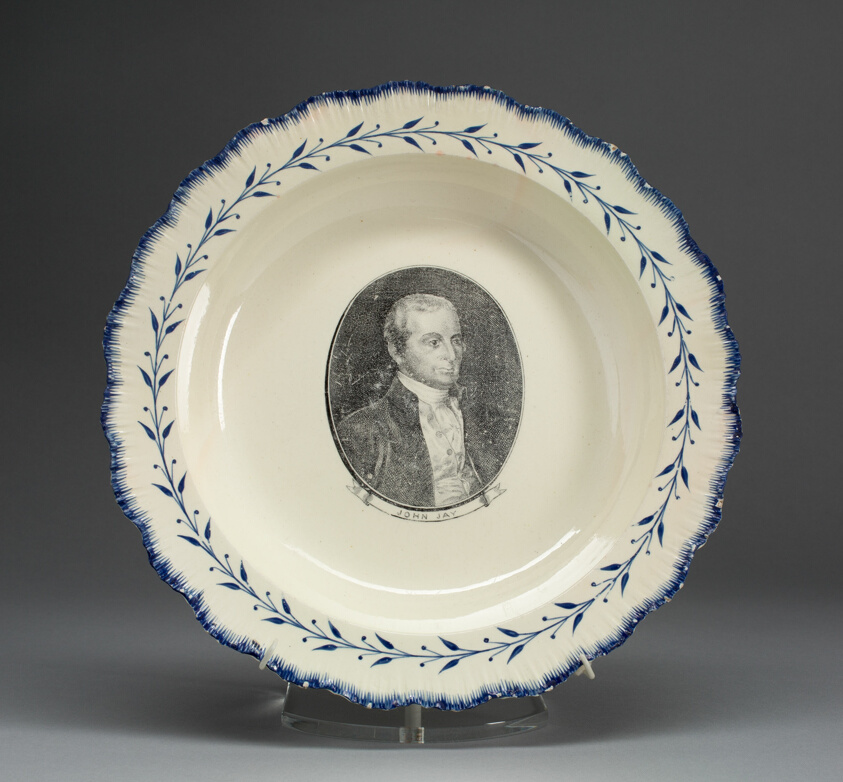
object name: Decorative Arts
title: Soup Plate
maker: English for the American market; Leeds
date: c. 1790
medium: Creamware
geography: England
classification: plate (general, dish); tableware; american decorative arts; porcelain; european decorative arts; ceramics; decorative arts